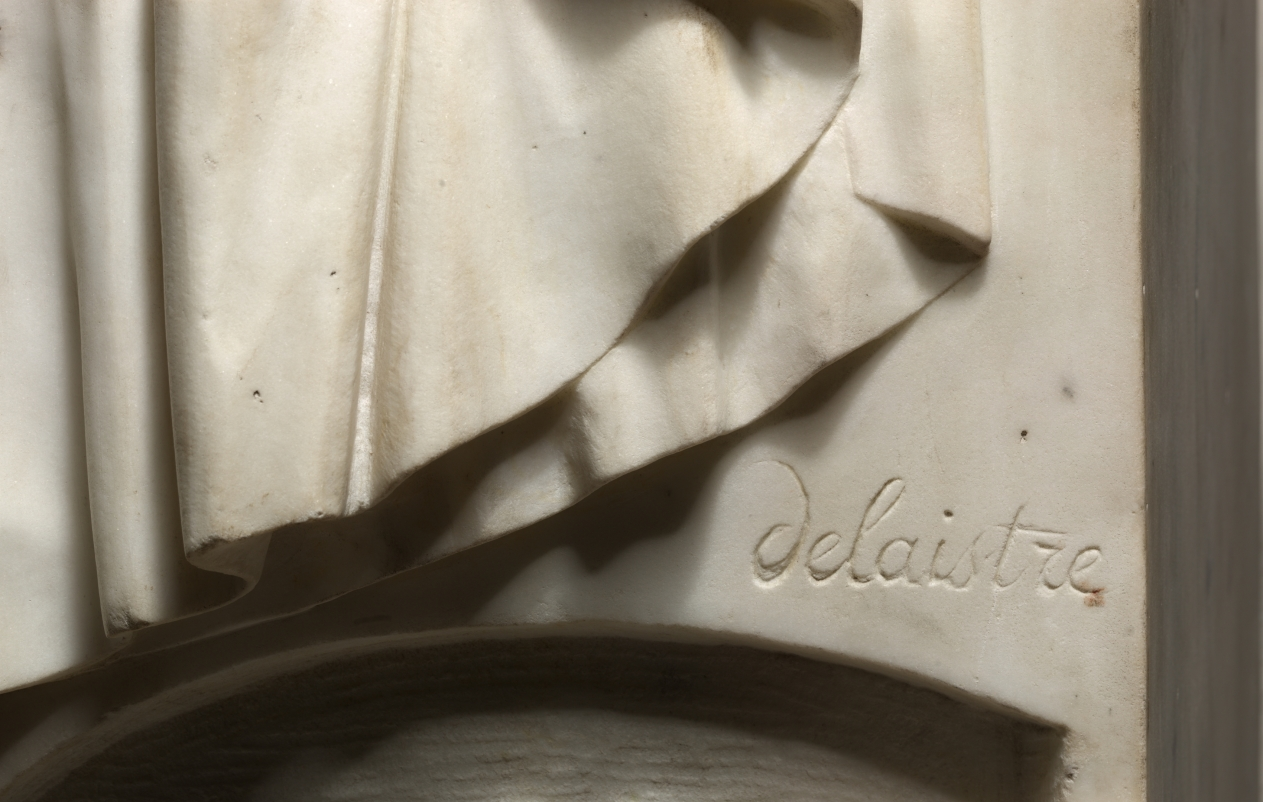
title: Funerary Monument for the Marquis de Tourney (for the Chapel of the Château de la Falaise)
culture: France, Paris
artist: François-Nicolas Delaistre (French, 1746–1832)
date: 1787–1793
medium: marble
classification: Sculpture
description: The Marquis Gallyot de Tourney commissioned this sculpture to serve as his funeral monument. It depicts a young woman gesturing with one hand toward an urn bearing the inscription Voilà ce coeur qui nous a tant aimé (Here is the heart that loved us so). The marquis specified that the figure should be a rosière, a virtuous woman of humble circumstances, a choice likely informed by the writings of Enlightenment philosophers, especially Jean-Jacques Rousseau, who championed greater social equality and democratic reform.